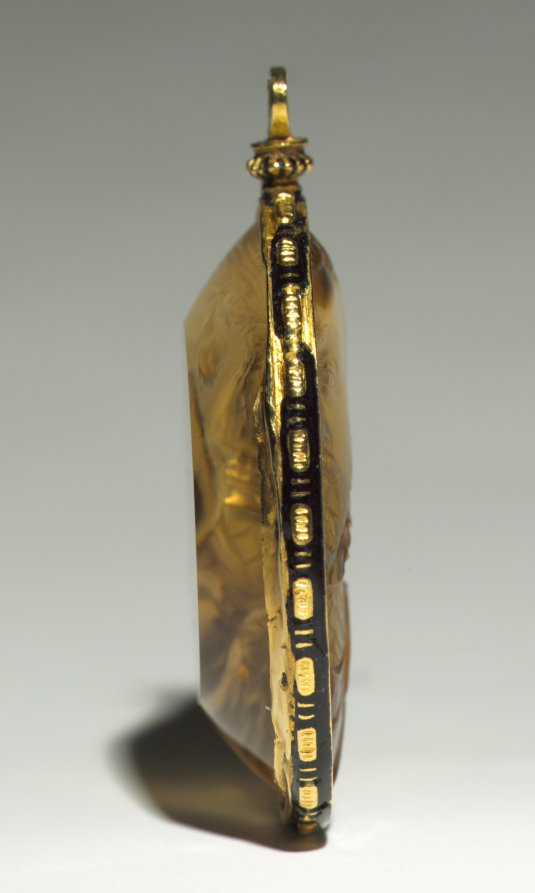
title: Portrait of Philip II, King of Spain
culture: Italy, 16th century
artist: Alessandro Cesati (Italian, before 1538-after 1564)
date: mid-1550s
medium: citrine, mounted in a gold and enamel pendant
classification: Sculpture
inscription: Signed on collar .A.E. (Likely abbreviation for “ΑΛΕΞΑΝΔΡΟΣ ΕΠΟΙΕΙ”, or “Alexandros Epoiei,” which translates to “Alexander made [me / this].”)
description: Clad in armor, Philip II wears a chain with the Order of Golden Fleece around his neck. The remarkably precise and varied cutting describes the textures of cloth, metal, skin, and hair while presenting the king’s features with striking naturalism—complete with receding hairline and prominent chin—as well as conveying his forceful character. Carved gems were luxury arts of the highest order in the Renaissance, hotly collected and used as diplomatic gifts. The original patron is not yet known, but cameos played a prominent role at the Spanish court, where the royal family often hold gems of Philip II in their portraits. The yellow quartz, rare in the 1500s, probably came from a newly opened source in South America; this object is thus both a natural marvel and a masterful portrait. One of only three known works signed by the artist (his initials appear at miniscule scale on the collar just below the knot of cloth), this stone is also likely in its original setting.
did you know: The ancient Romans believed citrine, a type of quartz, offered protection against evil thoughts.